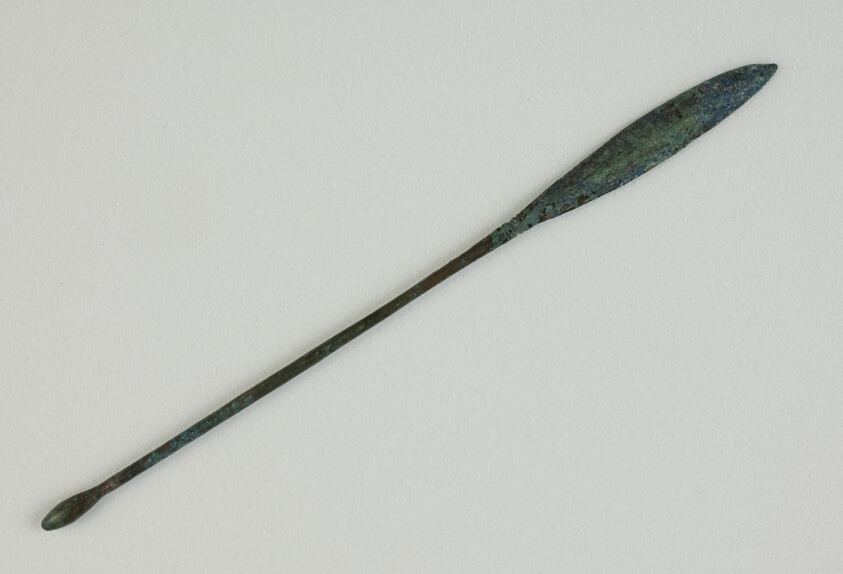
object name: Costume and Accessories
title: Cosmetic Applicator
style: syrian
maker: Roman; Levant or Syria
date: 4th century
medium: Bronze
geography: Syria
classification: bronze; metal; utensil; ancient art; costume